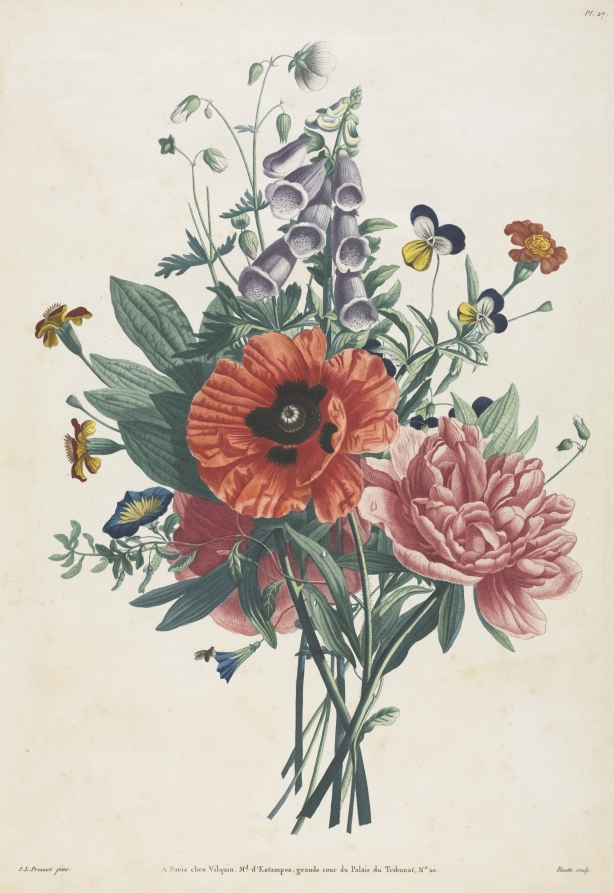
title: Collection of Flowers and Fruits Painted after Nature: Bouquet of Foxglove, Clematis, Pansy, Peony, Poppy, and Yellow Day Lily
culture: France, late 18th-early 19th Century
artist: Louis Charles Ruotte (French, 1754–1806)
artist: after Jean Louis Prévost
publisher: Jean Louis Prévost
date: 1805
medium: color stipple with watercolor added by hand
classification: Print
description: By the mid-17th century, there was a surge of interest in beautiful, exotic plants and formal royal gardens. At Fountainebleau and the Louvre, the gardens were filled with flowers from far-away places, such as the Near East, India, the East and West Indies, and South America. In 1735 Carl Linnaeus (1707-1778) invented the first scientific classification system for 7,700 plants. As a result, accuracy as well as artistic skill were required for the numerous portfolios of botanical prints popular with gardeners and those involved with the decorative arts. In these lavish productions, some of the color is printed but the remainder is added with watercolor, giving the illusion of transparency, luminosity, and the delicacy characteristic of flowers. Stipple was a technique developed in England from the 1760s. A point is used to build up a mass of flicks and dots to create a wide range of tones.